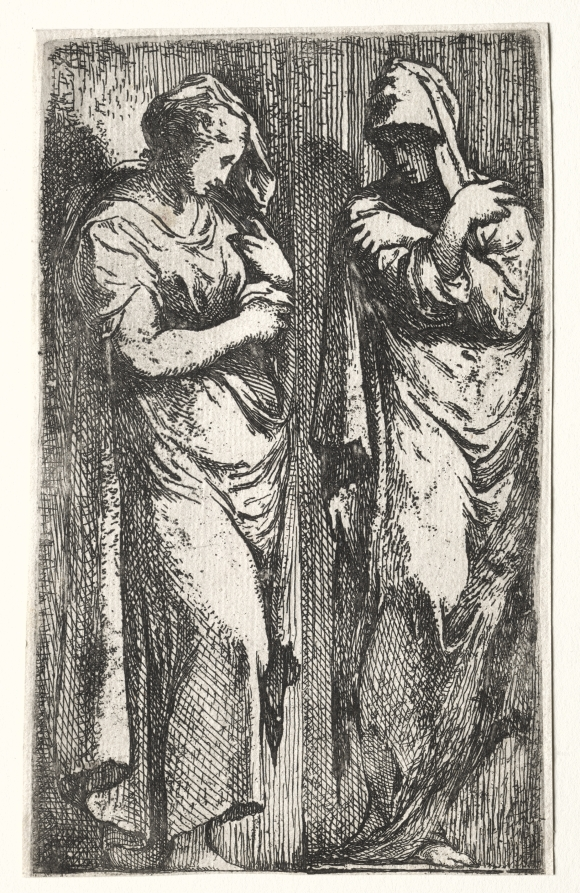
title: Two Roman Women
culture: Italy, 16th century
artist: Francesco Primaticcio (Italian, 1504–1570)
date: c. 1550–60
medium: etching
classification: Print